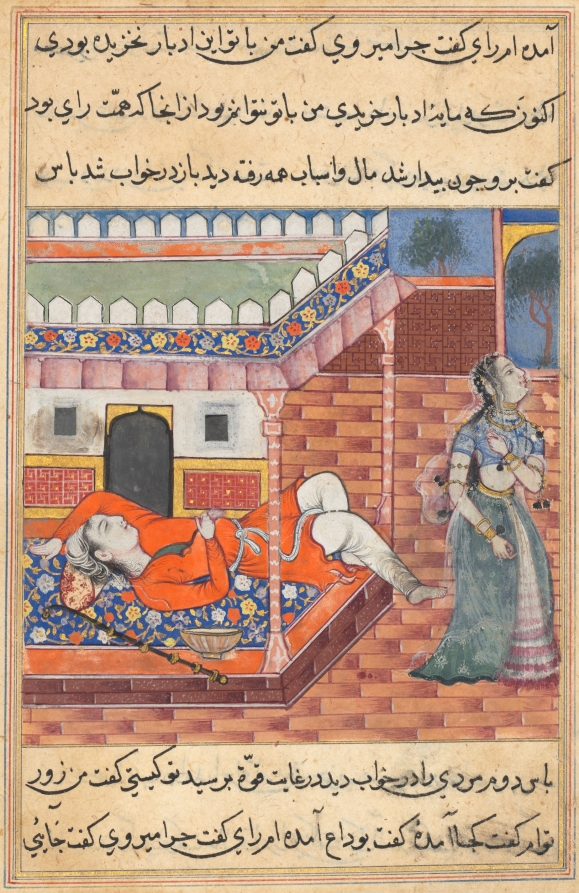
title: The king dreams of a lady, the personification of wealth, departing from him on account of his purchasing a bowl and a staff from a yogi, from a Tuti-nama (Tales of a Parrot): Thirty-sixth Night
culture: Mughal India, court of Akbar (reigned 1556–1605)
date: c. 1560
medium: gum tempera, ink, and gold on paper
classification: Painting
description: The sleeping king lies sprawled across a bed with the bowl and staff at his side. These inauspicious purchases represent his impending loss of wealth. He allows the woman to leave and, upon waking, finds that all of his possessions have disappeared.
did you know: The king experiences three more dreams, representing his strength, reason, and good deeds.